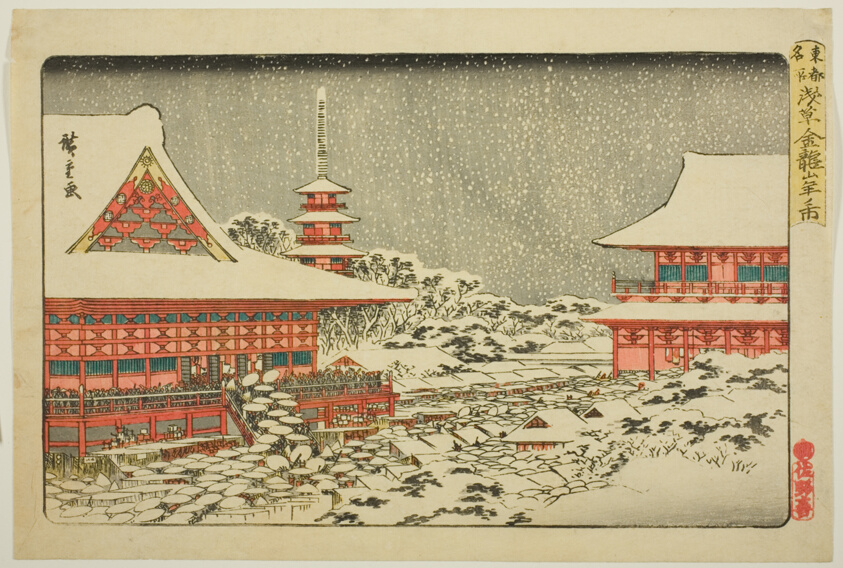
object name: Print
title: Year-end Fair at Kinryuzan Temple in Asakusa (Asakusa Kinryuzan toshi no ichi), from the series "Famous Places in the Eastern Capital (Toto meisho)"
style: Japanese (culture or style)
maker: Utagawa Hiroshige 歌川 広重; Japanese, 1797-1858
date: c. 1835/38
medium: Color woodblock print; oban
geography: Japan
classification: woodblock print; print; asian art